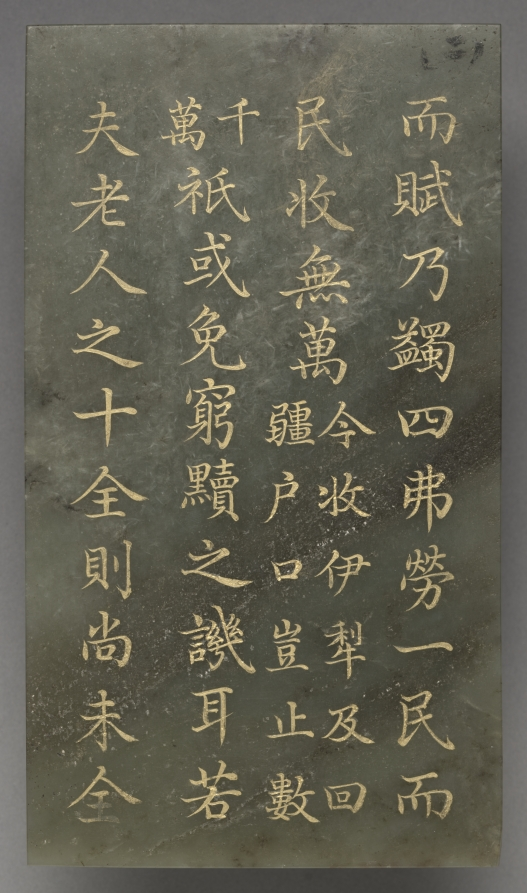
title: Tablet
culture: China, Qing dynasty (1644–1911), Qianlong reign (1736–95)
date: 1778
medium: jade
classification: Jade